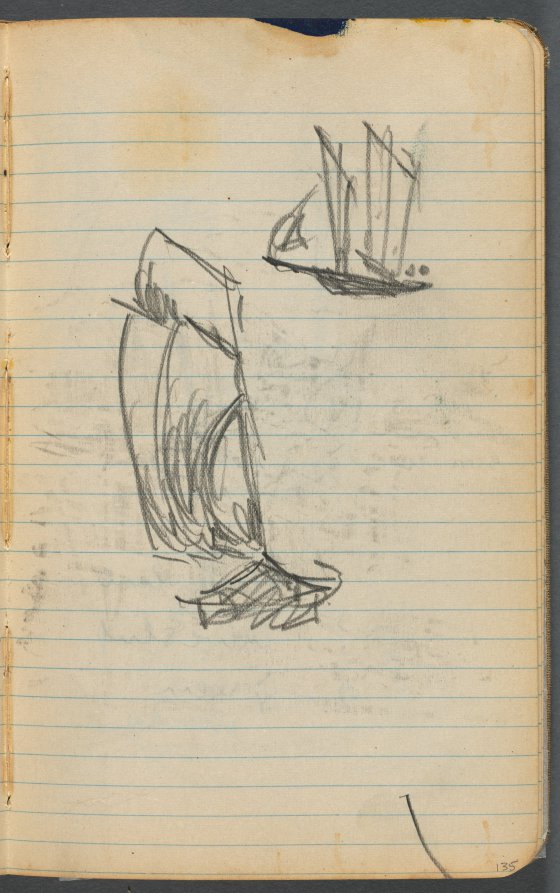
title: Sketchbook, page 135: Sailboats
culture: America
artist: Maurice Prendergast (American, born Newfoundland [now Canada], 1858–1924)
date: 1905–10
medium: graphite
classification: Bound Volume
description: This sketchbook contains 69 pages of drawings, a diary largely devoted to the state of the artist's health, and a three-page discourse on the nature of genius and ideas.